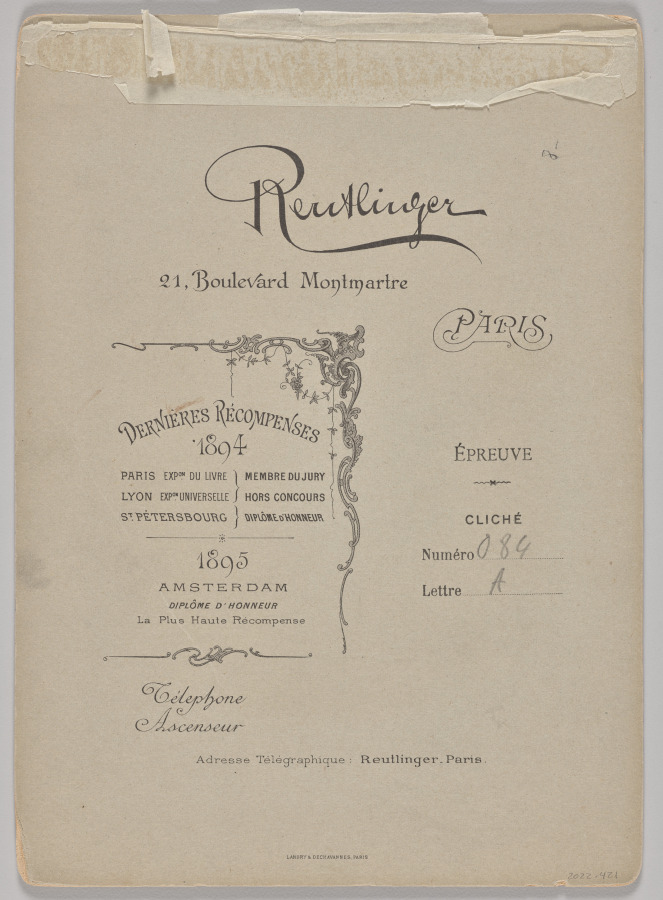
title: Untitled (young boy with lace collar and toy rifle)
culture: France, 19th century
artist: Reutlinger Studios (French, active 1850s-1937)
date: 1880s–90s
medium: gelatin silver print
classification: Photograph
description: This portrait of a boy holding a rifle suggests an association of masculinity with militarism in that era. Militaristic attitudes had a strong hold in France following the country’s defeat in the 1870–71 Franco-Prussian War. Many French people wanted revenge for Prussia’s annexation of Alsace-Lorraine, territories that did not return to French control at the end of World War I in1919. Looking at this portrait in hindsight, one might wonder if this boy served in the military or was a casualty during that war.